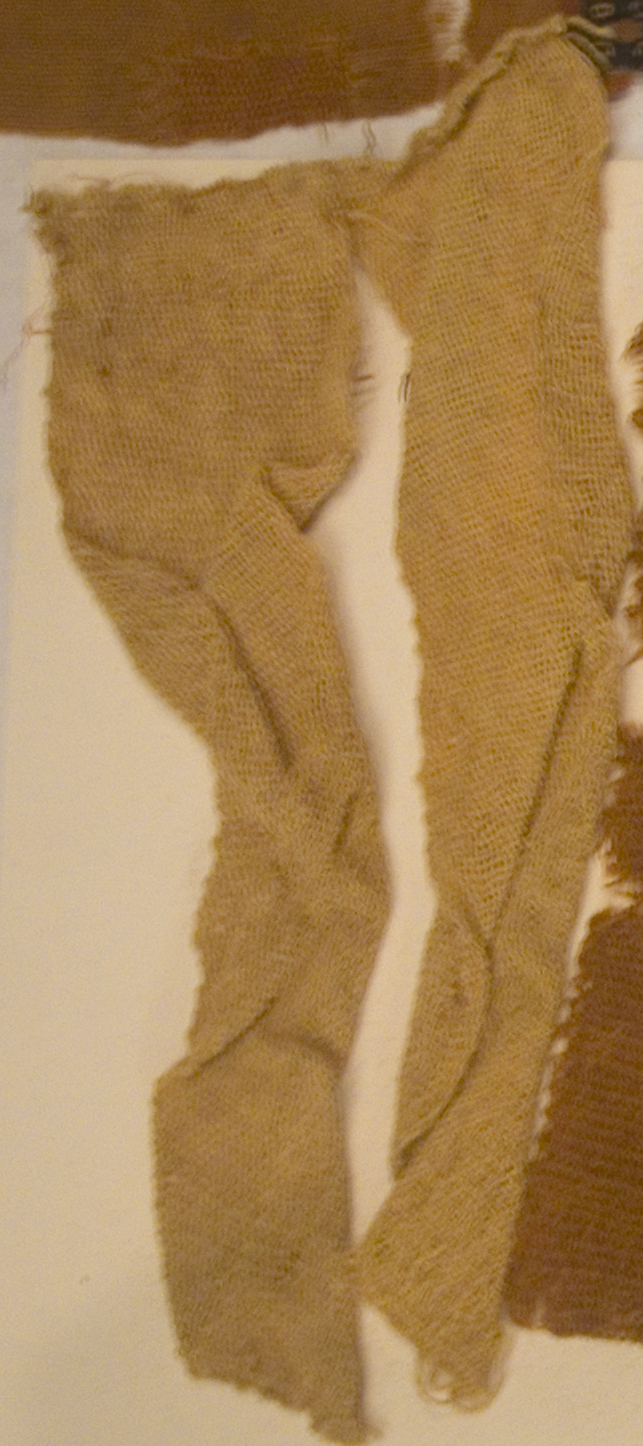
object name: Textile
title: Fragment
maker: Peru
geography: Peru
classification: textile; weaving